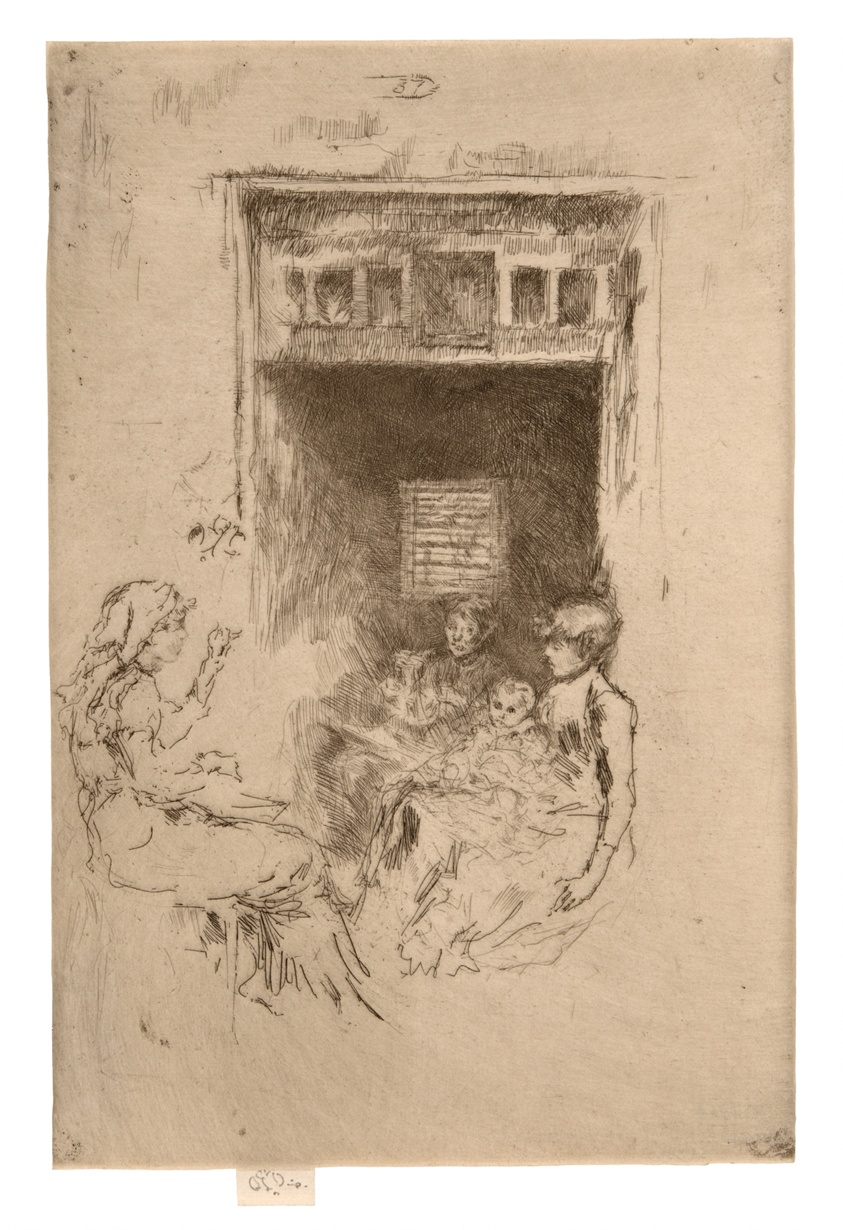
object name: Print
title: Bead Stringers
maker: James McNeill Whistler (American, 1834-1903)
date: 1880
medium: Etching and drypoint with foul biting in black ink on ivory laid paper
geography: United States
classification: etching; foul biting; print; prints and drawing; paper; drypoint